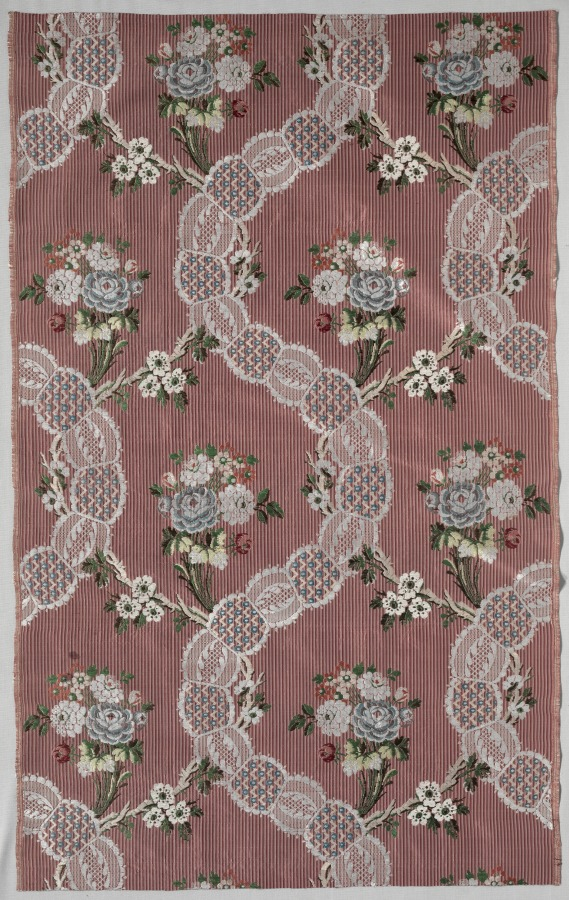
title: Lengths of Silk Brocade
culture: France, 18th century, Period of Louis XVI (1774-1793)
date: 1774–1793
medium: brocade, silk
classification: Textile